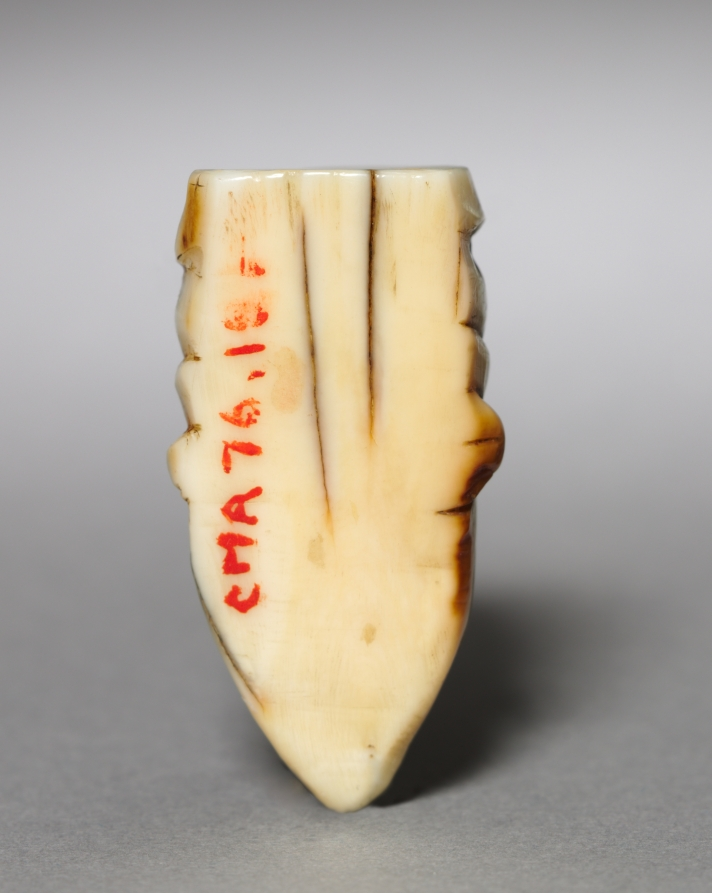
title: Pendant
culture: Central Africa, Democratic Republic of the Congo, Pende, 19th century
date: late 1800s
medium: ivory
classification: Jewelry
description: Pendants like these were worn as symbols of protection.